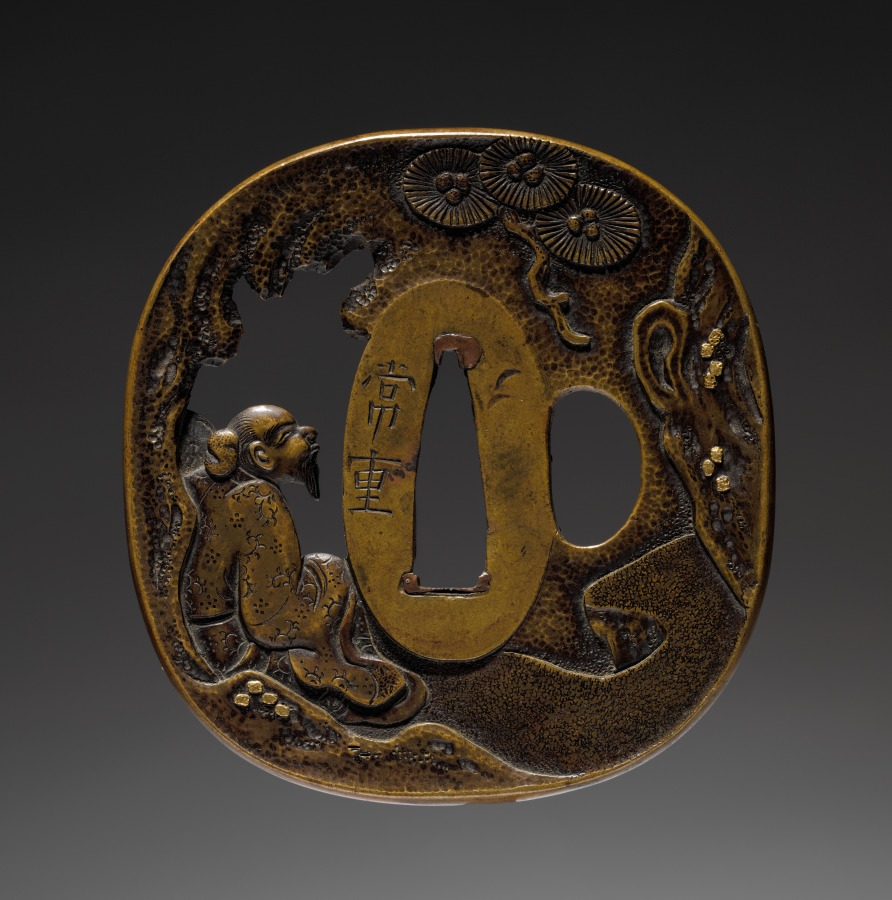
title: Sword Guard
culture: Japan, Edo period (1615–1868)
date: mid-1700s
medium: brass (possibly Mito type)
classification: Arms and Armor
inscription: signed "Tsuneshige."